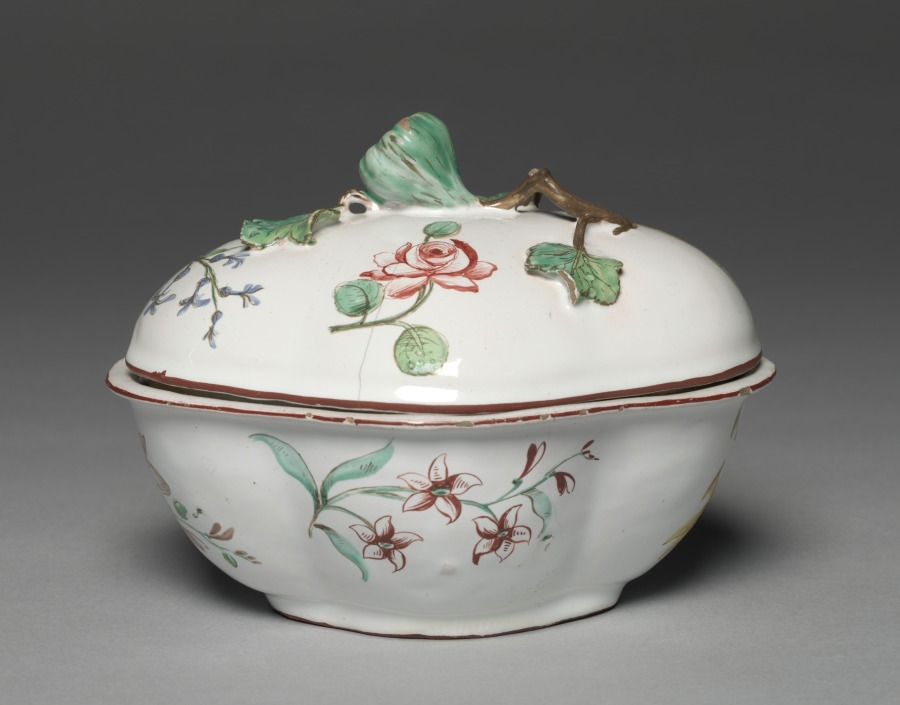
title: Sugar Basin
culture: France, 18th century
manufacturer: Sceaux Factory (French, active 1748–66)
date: c. 1750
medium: faience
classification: Ceramic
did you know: In medieval Italian churches, painted altarpieces served as a focal point for worshippers during the rituals of faith. The figures of Jesus, Mary, and eight saints are framed by a golden background that would have glistened in the flickering candlelight of the church.